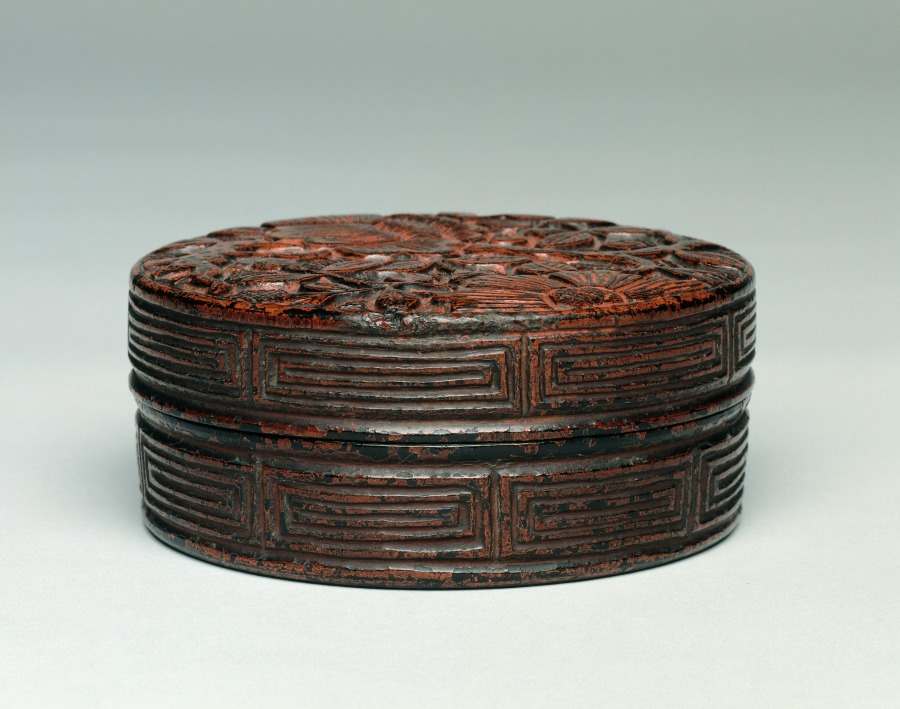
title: Incense Box (Kogo) with Camellia Design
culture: Japan, Muromachi period (1392–1573)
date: 1500s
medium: carved wood with black and red lacquer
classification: Lacquer